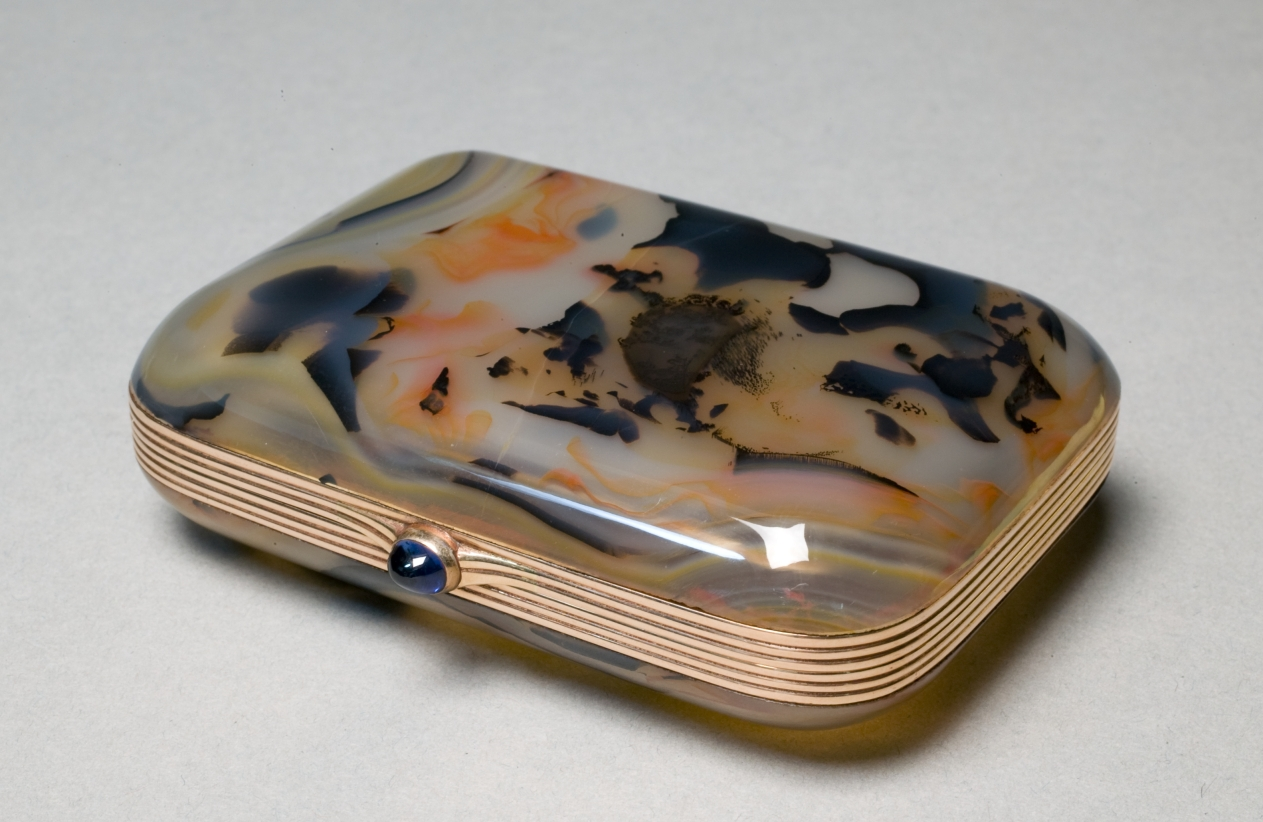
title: Cigarette Case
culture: Russia, St. Petersburg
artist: House of Fabergé (Russian, 1842–1918)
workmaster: Eric August Kollin (Russian, 1836–1901)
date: c.1885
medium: tan tree agate with ribbed gold mounts and interior gold cigarette restraints set with cabechon sapphire thumpiece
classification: Miscellaneous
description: This cigarette box displays one of the quintessential qualities of chief workmaster Erik Kollin’s craft—mounting superior vessels cut from agate with tasteful gold mounts. This casing is so delicate and finely made that the contents, held inside by a simple yet elegant bar, would almost be visible from the exterior. This particular box is made from a tan tree agate that is reminiscent of a patterned fish or tortoise.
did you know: Created during Finnish-born Erik Kollin’s last year as Fabergé’s chief workmaster.